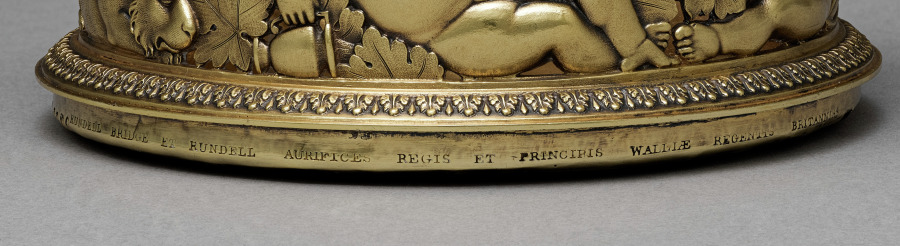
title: Decanter Stand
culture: England, London, 19th century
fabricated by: Paul Storr (British, 1771–1844)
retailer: Rundell, Bridge and Rundell (British, 1797–1834)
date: 1814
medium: silver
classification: Silver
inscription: Engraved on rim of base: "RUNDELL BRIDGE ET RUNDELL AURIFICES REGIS ET PRINCIPIS WALLIAE REGENTIS BRITANNIAS." Engraved on base of interior: Unidentifiable crest with bird over other animal.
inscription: Scratched on rim of base: "6625"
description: Decanter stands served as coasters for glass wine bottles in order to protect the extremely expensive and fragile linen tablecloths they sat upon. This example contains depictions of large grape vines and youthful figures that evoke the Roman god of wine, Bacchus (or Dionysus in Greek mythology). One of the young boys grasps an empty drinking vessel while the other leans against a panther, the frequent companion of Bacchus.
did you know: Bacchanal motifs of grapes and consumption echo this object’s function as a stand for a wine decanter.